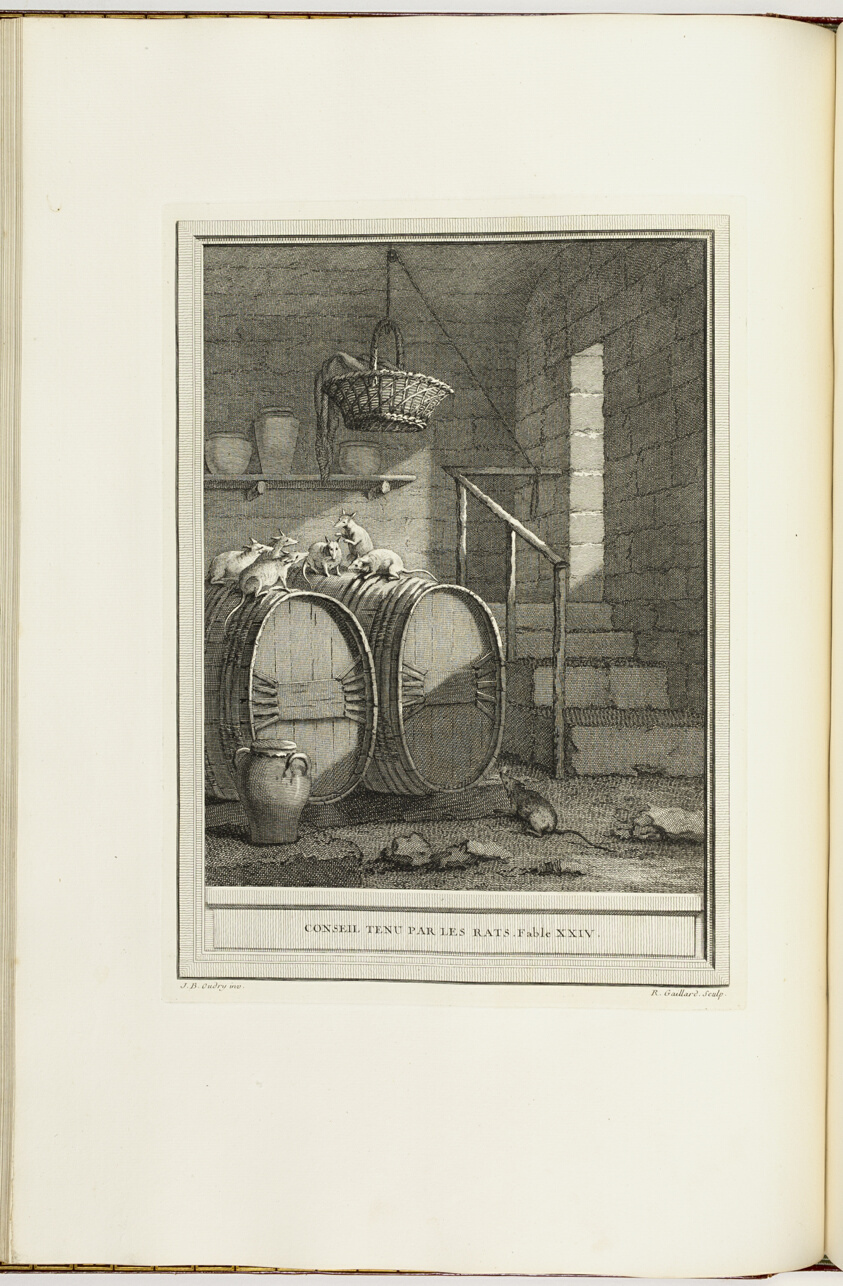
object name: Book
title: Fables choisies, mises en vers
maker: Illustrations designed by Jean-Baptiste Oudry (French, 1686-1755); written by Jean de la Fontaine (French, 1621–1695); engravings by Charles-Nicolas Cochin (French, 1715–1790), Nicolas-Gabriel Dupuis (French, 1698–1771), Dominique Sornique (French, 1708–1756), Pierre François Tardieu (French, 1711–1771), René Gaillard (French, c. 1719–1790), Pierre Chenu (French, c. 1718-c. 1800), Michel Aubert (French, 1700-1757), Jean Charles Baquoy (French, 1721-1777), Pierre-Étienne Moitte (French, 1722-1780), Etienne Fessard (French, 1714-1777), Jean Ouvrier (French, 1725-1754), Claude Olivier Galimard (French, 1719-1774), Jean-Jacques Flipart (French, 1719-1782), Nicolas Dauphin de Beauvais (French, c. 1687-1763), Louis-Claude Legrand (French, 1723–1807), Pierre Quentin Chedel (French, 1705-1763), Pierre Aveline (French, 1702-1760), Jacques Philippe Le Bas (French, 1707–1783), Pieter Franciscus Martenisie (Flemish, 1729-1789), Laurent Cars (French, 1699-1771), Jean Pelletier (French, born c. 1736), Pierre Louis de Surugue (French, 1716-1772), Jacques-Jean Pasquier (French, 1718-1785), Johann Christoph Teucher (German, c. 1716-c. 1750), Juste Chevillet (German, 1729-1790), Johann Heinrich Rode (German, 1727-1759), Élie du Mesnil (French, born 1726), Martin Marvie (French, 1713-1813), Jacques Firmin Beauvarlet (French, 1731-1797), William Wynne Ryland (British, 1732-1783), Jacques Aliamet (French, 1726-1788), Noël Le Mire (French, 1724-1801), Louis-Simon Lempereur (French, 1728-1807), and Antoine Radigues (French, 1721-1809); wood engravings by Nicolas Le Sueur (French, 1691–1764) after illustrations designed by Jean Jacques Bachelier (French, 1724-1806); printed by Charles-Antoine Jombert (French, 1712–1784); published by Desaint et Saillant (French, 18th century) and Durand (French, 18th century)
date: 1755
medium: Bound book with engravings, with etching, wood engravings and letterpress in black on ivory laid paper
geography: France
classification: book; prints and drawing